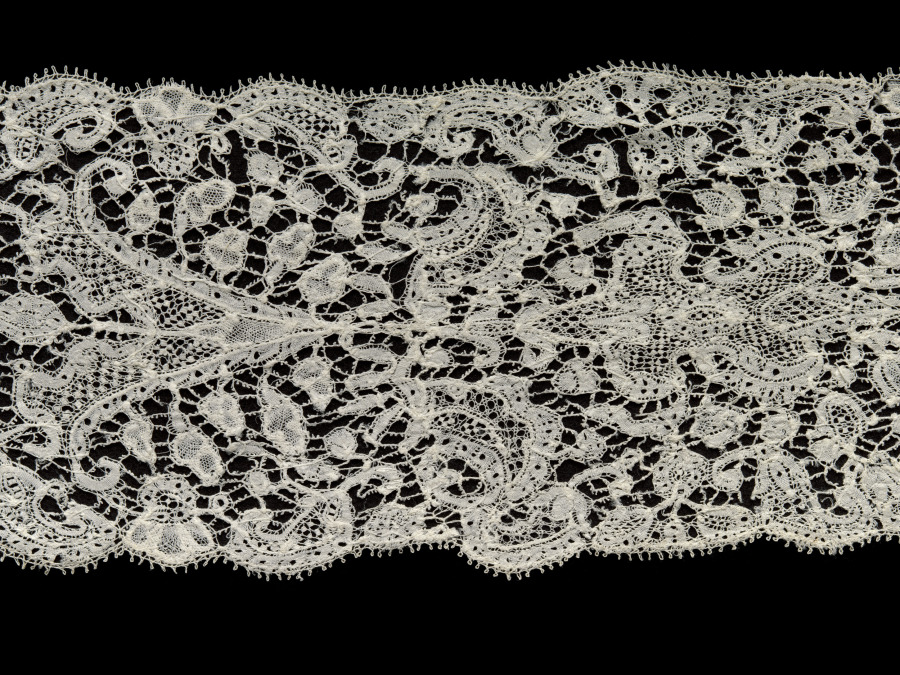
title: Lace Lappet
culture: Belgium, Brussels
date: early 1700s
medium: Linen: bobbin lace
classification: Lace